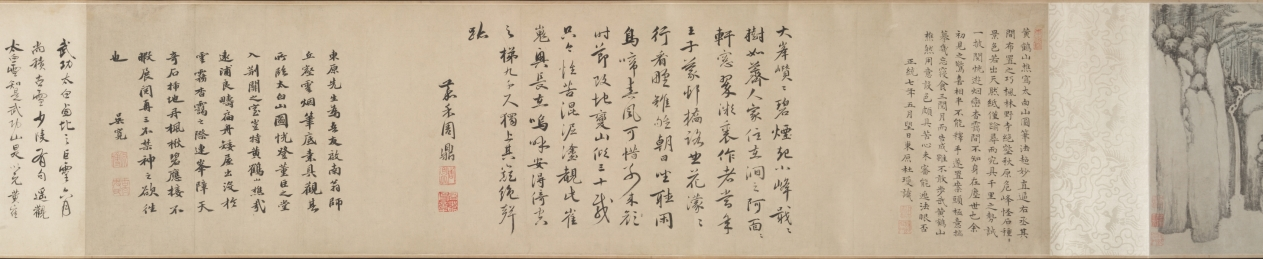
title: Mt. Taibo in the Style of Wang Meng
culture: China, Ming dynasty (1368–1644)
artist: Du Qiong (Chinese, 1396–1474)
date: 1442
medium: handscroll; ink and light color on paper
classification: Painting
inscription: Artist's inscription, signature, and 11 seals: [1 seal] Tung-yüan chai. Huang-ho-shan-ch'iao [Wang Meng] painted a painted called T'ai-po Mountain. Its brushwork is superior and admirable, which is very close to Yu-ch'en [Wang Wei, 699-759]. The cleverness of its composition, the maple groves and rustic temples, the inaccessible ravines and autumnal plateaus, the periolous peaks and strange rocks, etc., all seem to be so natural. The paper is only a little over eight feet, but the landscape has the range of a thousand miles. Once you open and note the contents, it is as if one were roaming among the mountain peaks enveloped in mist and clouds, and forgot the dusty world. When I first saw this, I was so mixed with excitement and joy that I could not take my hands off the painting. So I put it on the table, and tried my best to imitate it, forgetting sleeping and eating for about three months before it was completed. Although I do not dare to tread in the footsteps of Huang-ho shan ch'iao, I took great pains to capture his spirit in composition and colors. I do not know whether it would pass the judgment of the experts. On the fifteenth day of the fifth month, the seventh year of the Cheng-t'ung year [1442], inscribed by Tung-yüan, Tu Chiung. [2 seals] Yung-chia; Ching-chieh ming-men. [8 seals on painting] Tung-yüan chai; Ching-chieh ming-men; Yung-chia; Tu Ch'iung yin; Tung-yüan (repeated 5 times). trans. WKH/LYSL 3 colophons and 7 additional seals: 1 colophon and 2 seals of Chou Ting (1401-1487); 1 colophon and 2 seals of Wu K'uan (1435-1504); 1 colophon, dated 1655, and 2 seals of Lan Ying (1585-after 1664).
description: When a Chinese painter "imitated" a painting by a past master, the intention was never to produce an exact copy. Du Qiong, the Ming painter from Suzhou, is a case in point. The painting style of this handscroll is actually closer to that of Huang Gongwang (1269–1354) than to the style of Wang Meng (about 1301–1385). Both masters were active during the previous dynasty and are among the so-called Four Great Masters of the Yuan dynasty (1279–1368). In this painting, the interplay of styles, including Du Qiong's own, contribute to an inner dimension that is more than visual. Mt. Taibo is located in the province of Zhejiang and is known for its scenic beauty. In this scroll, however, it is not depicted literally. The image is an ideal representation of mountains in southeastern China.